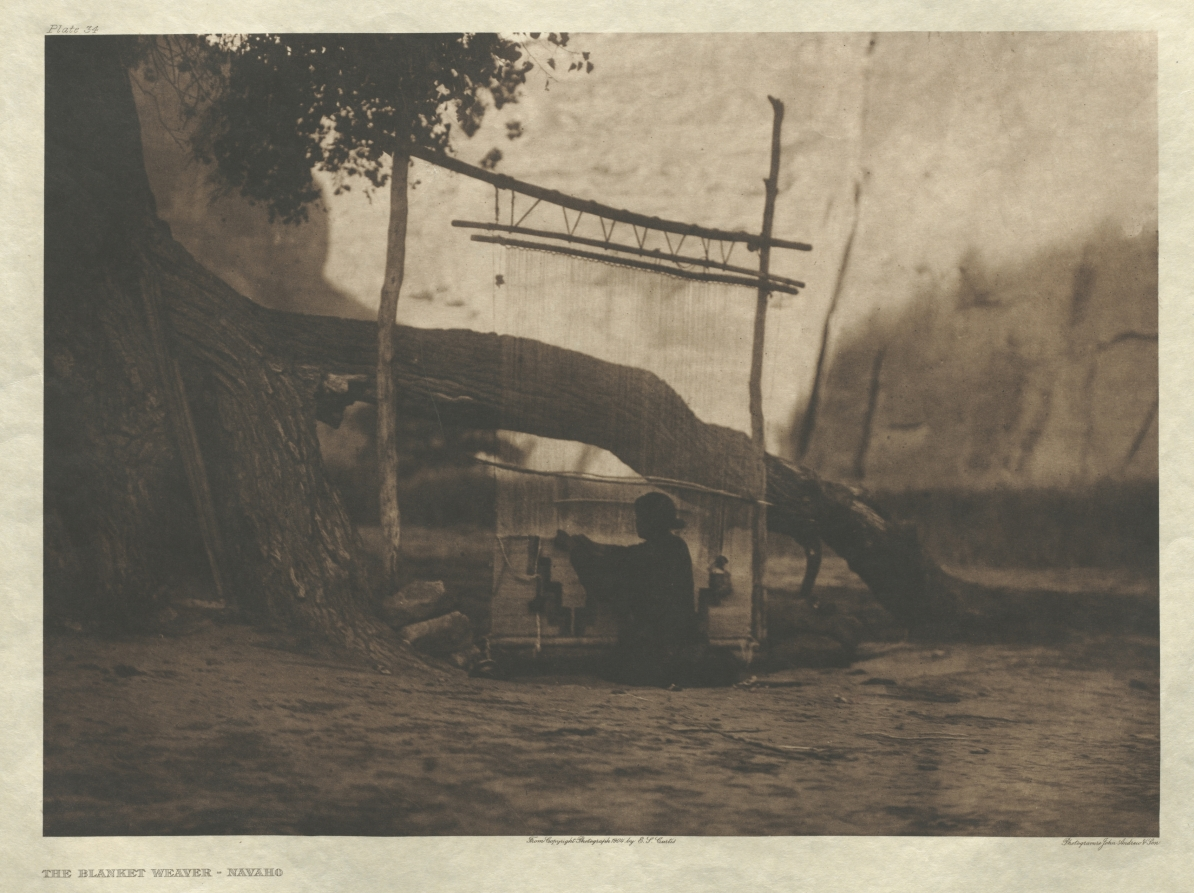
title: Portfolio I, Plate 34: The Blanket Weaver-Navaho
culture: America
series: The North American Indian: being a series of Portfolios picturing and describing the Indians of the United States, the Dominion of Canada, and Alaska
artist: Edward S. Curtis (American, 1868–1952)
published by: The University Press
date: 1904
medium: photogravure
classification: Portfolio